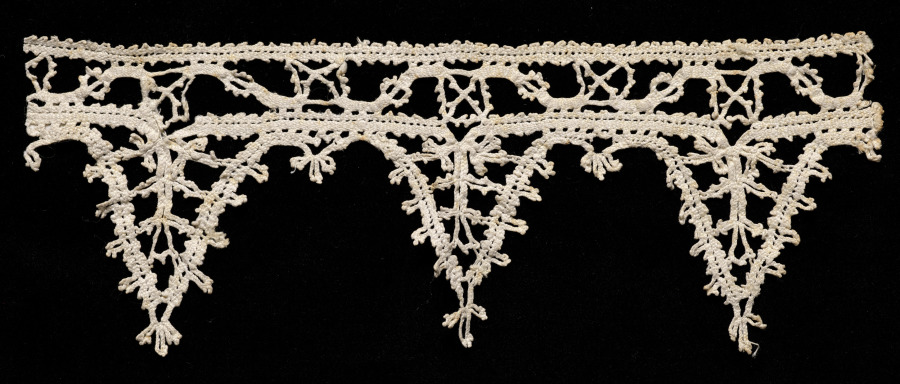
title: Lace Edging with Points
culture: Italy, Venice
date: 1500s–1600s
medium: Bobbin lace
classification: Lace